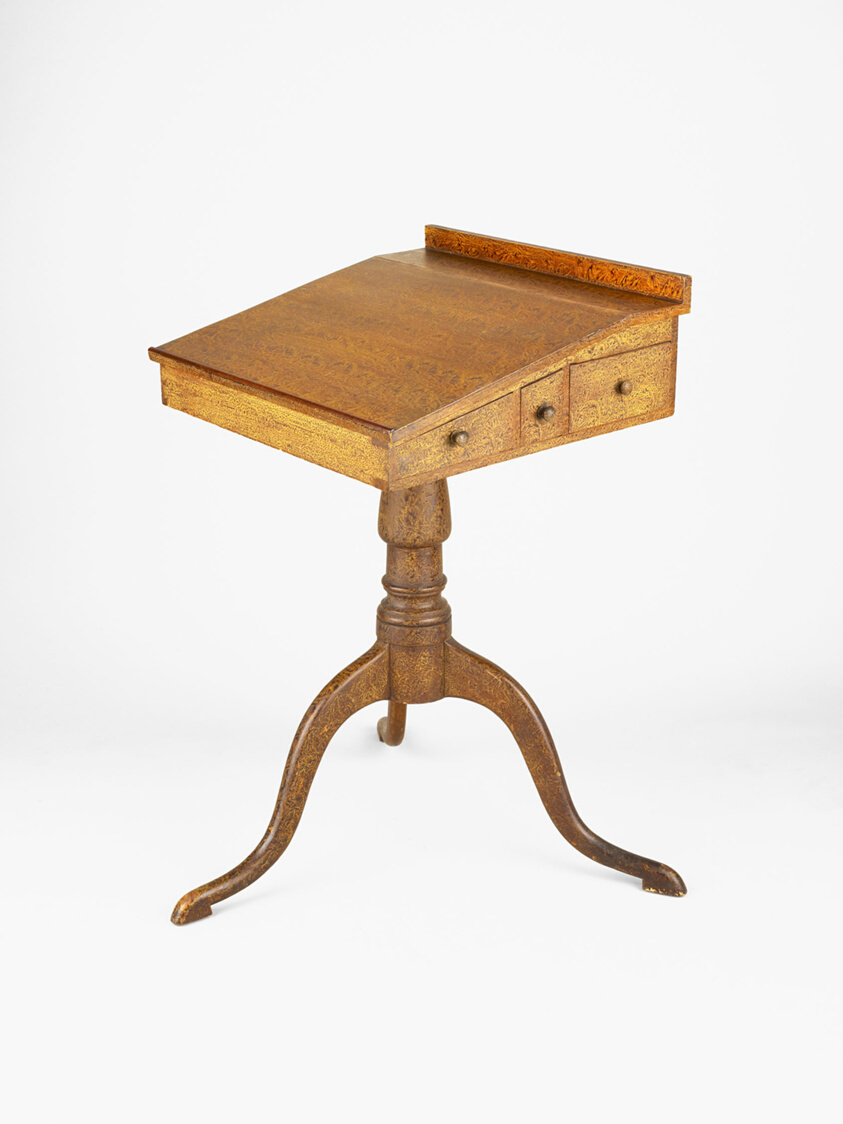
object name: Furniture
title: Writing Stand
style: Folk Art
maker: Artist unknown (American, 19th century); New England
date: 1835–70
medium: Easterrn white pine and soft maple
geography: New England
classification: desk; furniture; american decorative arts; american arts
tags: furniture